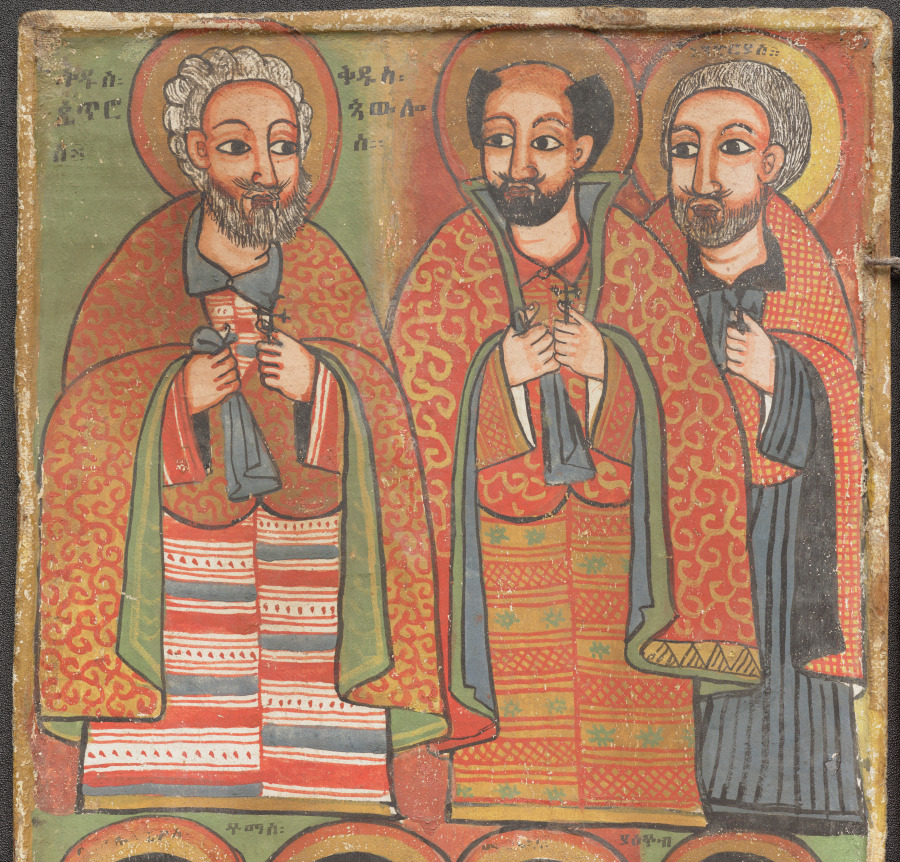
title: Diptych with Twelve Apostles & St. Paul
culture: Africa, East Africa, Ethiopia, presumably Gondär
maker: Workshop or Circle of Wäldä Maryam (Ethiopia, active mid- to late 1600s-early 1700s)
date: c. 1700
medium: Tempera, wood, textile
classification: Painting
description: Depicting 13 holy men, this diptych (two-panel painting) is sized for an Ethiopian Orthodox Christian church or elite home. It is painted in the bold, colorful style associated with royal court workshops from the early 1600s to the mid-1700s. Painter Wäldä Maryam (or someone he trained) set this scene of Christ’s apostles in the context of his homeland. Each saint wears fashionable clothing imported from India. While they are posed and dressed similarly to emphasize their group identity, the artist portrayed their faces and hairstyles individually. Captions in Ge’ez––an eastern African language dating to the 400s BCE––identify each by name.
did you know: Captions written in the language Gəˁəz identify each holy man by name. This African language is nearly 2,500 years old!